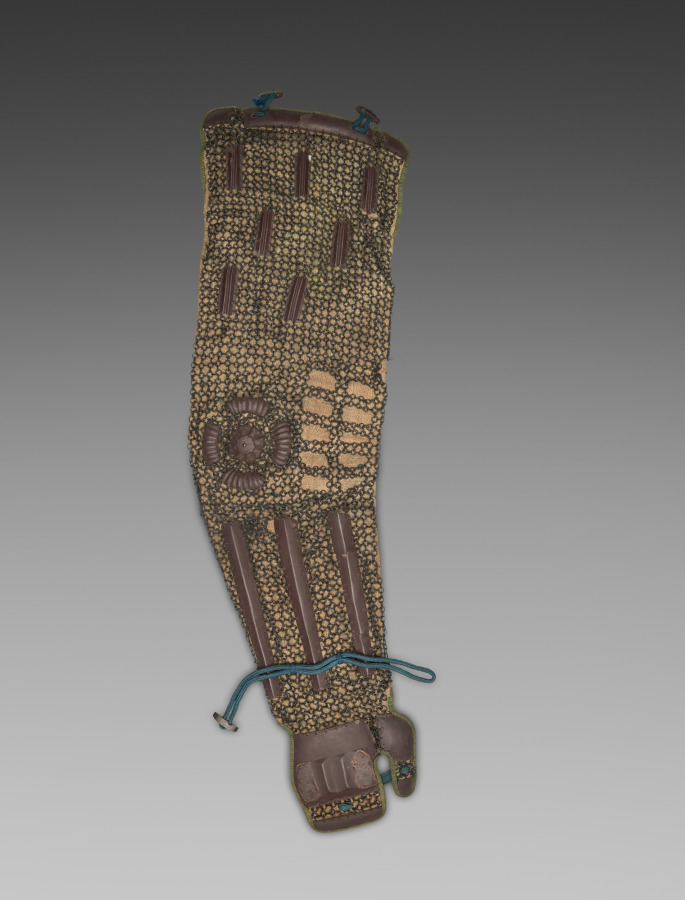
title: Armored Sleeve (Kote)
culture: Japan, Edo period (1615–1868)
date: 1615–1868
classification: Arms and Armor